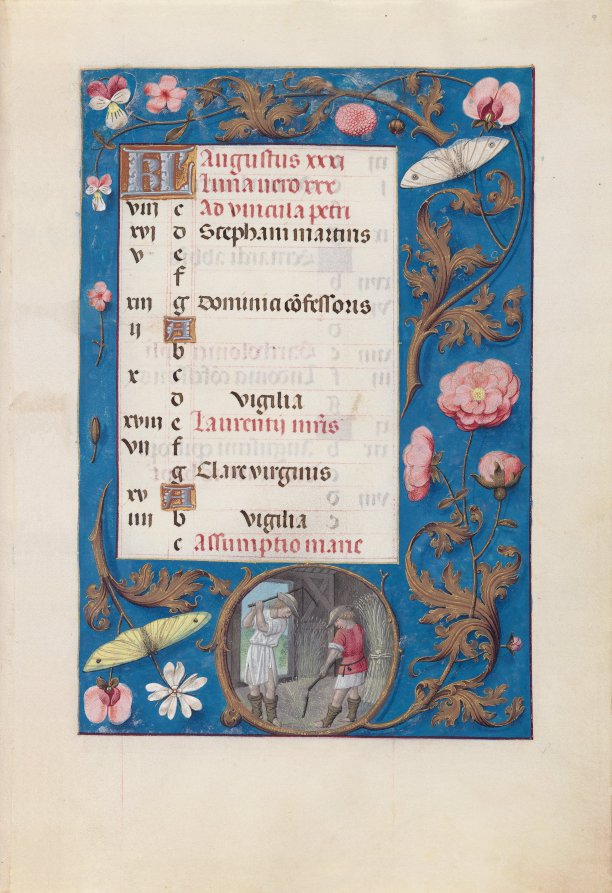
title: Hours of Queen Isabella the Catholic, Queen of Spain: Fol. 9r, August - Threshing Wheat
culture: Flanders, Ghent and Bruges, late 15th century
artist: Master of the First Prayerbook of Maximillian (Flemish, c. 1444–1519)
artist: and Associates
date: c. 1500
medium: ink, tempera, and gold on vellum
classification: Bound Volume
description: A great lover of Flemish art, Queen Isabella treasured her many devotional books. This deluxe manuscript was created for her private devotions by highly organized and distinctly talented manuscript painters active in Ghent and Bruges. The Ghent-Bruges school represents the culmination of Flemish book painting, whose main features were the use of rich colors, illusionistic effects, a love of landscape, and a strong sense of visual narrative. Manuscripts produced by this circle of artists are renowned for their border decoration featuring a rich variety of realistically painted flowers, scrolling acanthus leaves, birds, and butterflies.